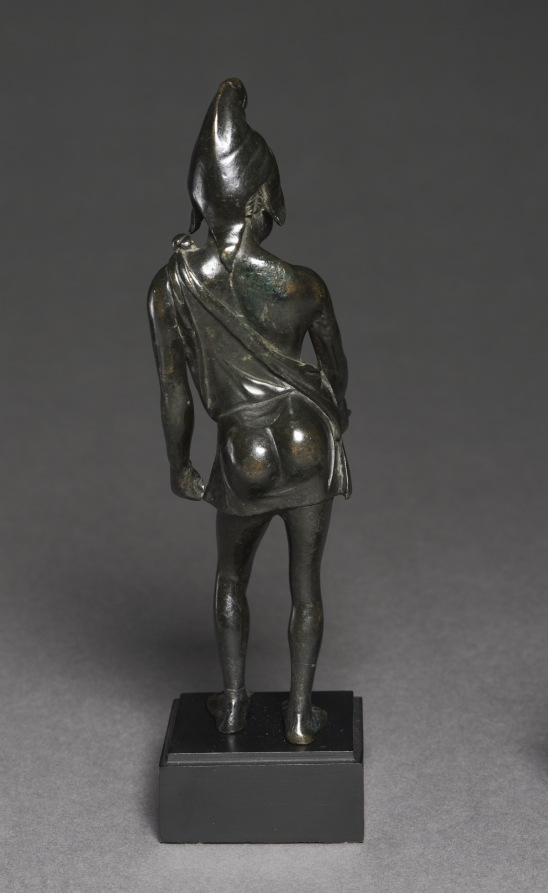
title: Statuette of a Black African Person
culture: Greece, Greco-Roman Period, late Ptolemaic Dynasty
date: 100–50 BCE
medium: bronze, solid cast, with silver and copper inlays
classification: Sculpture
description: Characterized as a Black African person by his hair, facial features, and unusually dark patina, this figure wears a non-Greek type of hat and a simple garment associated with lower classes. His stooped posture suggests that he may have a physical disability, something rarely depicted in Greek art. His right foot and right hand (with bowl) are modern restorations done before the statuette came to Cleveland, perhaps in the 1800s.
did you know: The intentionally dark patina contrasts with the inlaid silver eyes and copper lips.